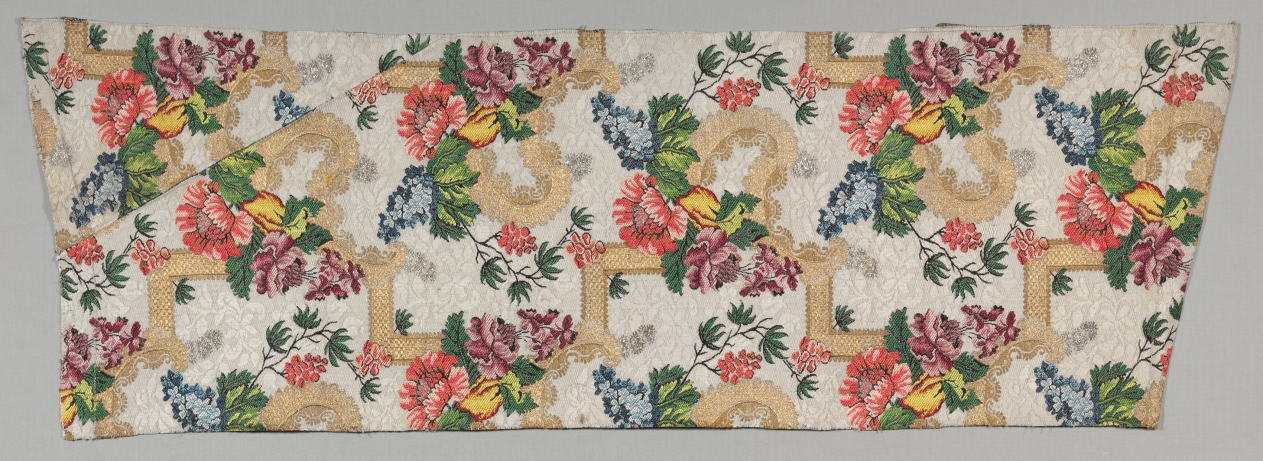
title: Brocaded Textile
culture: France or Italy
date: early 1700s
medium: brocade; silk and metal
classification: Textile